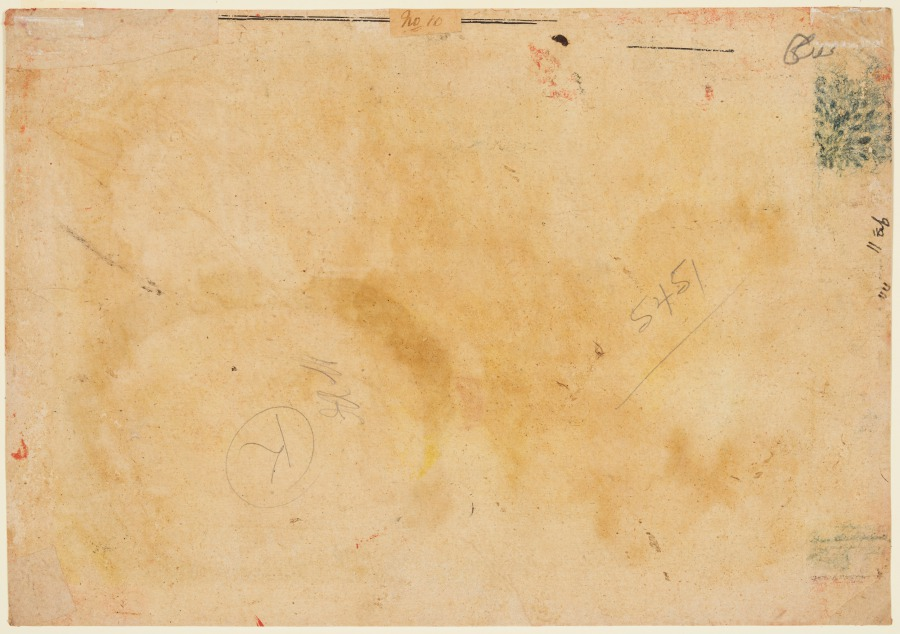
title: Descent of the Ganges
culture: Northern India, Pahari kingdoms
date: c. 1700–1710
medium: Gum tempera and gold on paper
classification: Painting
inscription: no. 10. 5451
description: In the upper left, Shiva sits with his wife Parvati on Mount Kailash in the Himalayas. She offers him a cup of wine, but Shiva looks down intently at the holy man Bhagiratha. He has stood on one leg for 1,001 years to obtain the gift of the Ganges River, which flows from Shiva’s topknot of hair. A dedicated devotee can divert the god’s attention, even from his beautiful wife and a cup of wine. By Mount Kailash is the icy Lake Manasarowar, still a major pilgrimage place for followers of Shiva. Hoping to earn the god’s favor, devoted practitioners perform acts of rigorous physical discipline.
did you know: Shiva and the other sages rest on tiger hides.